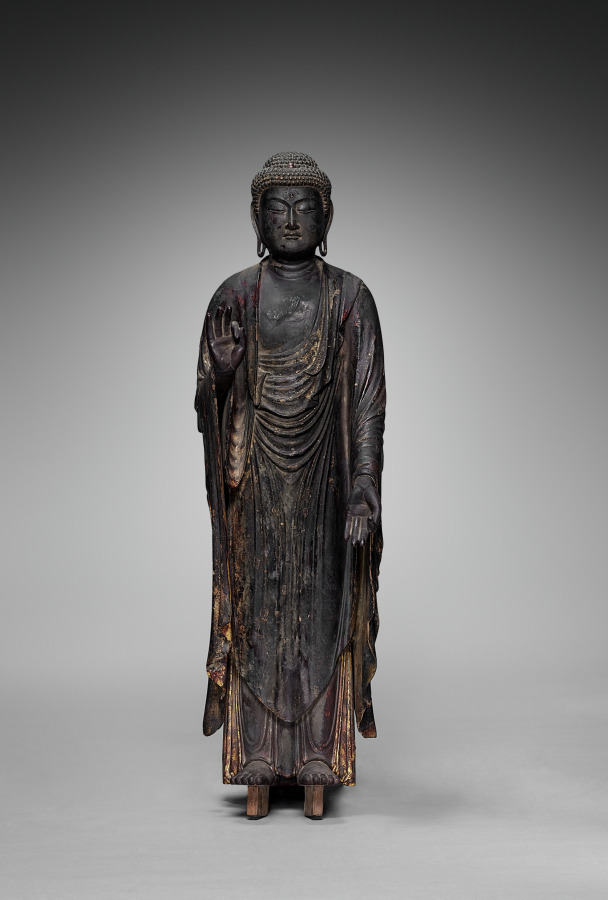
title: Amida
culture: Japan, Kamakura period (1185–1333)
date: 1200s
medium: Wood with lacquer and gilding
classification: Sculpture